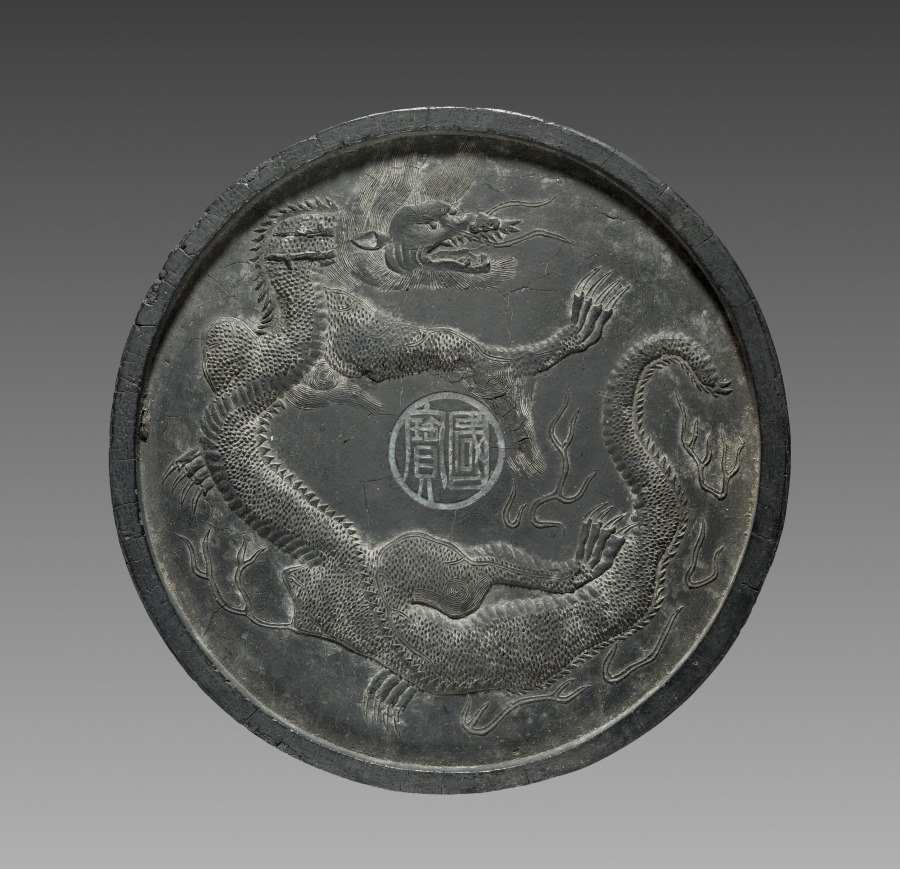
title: Ink Cake with Dragon in Relief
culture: China, Ming dynasty (1368–1644)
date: 1621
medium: ink cake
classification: Miscellaneous